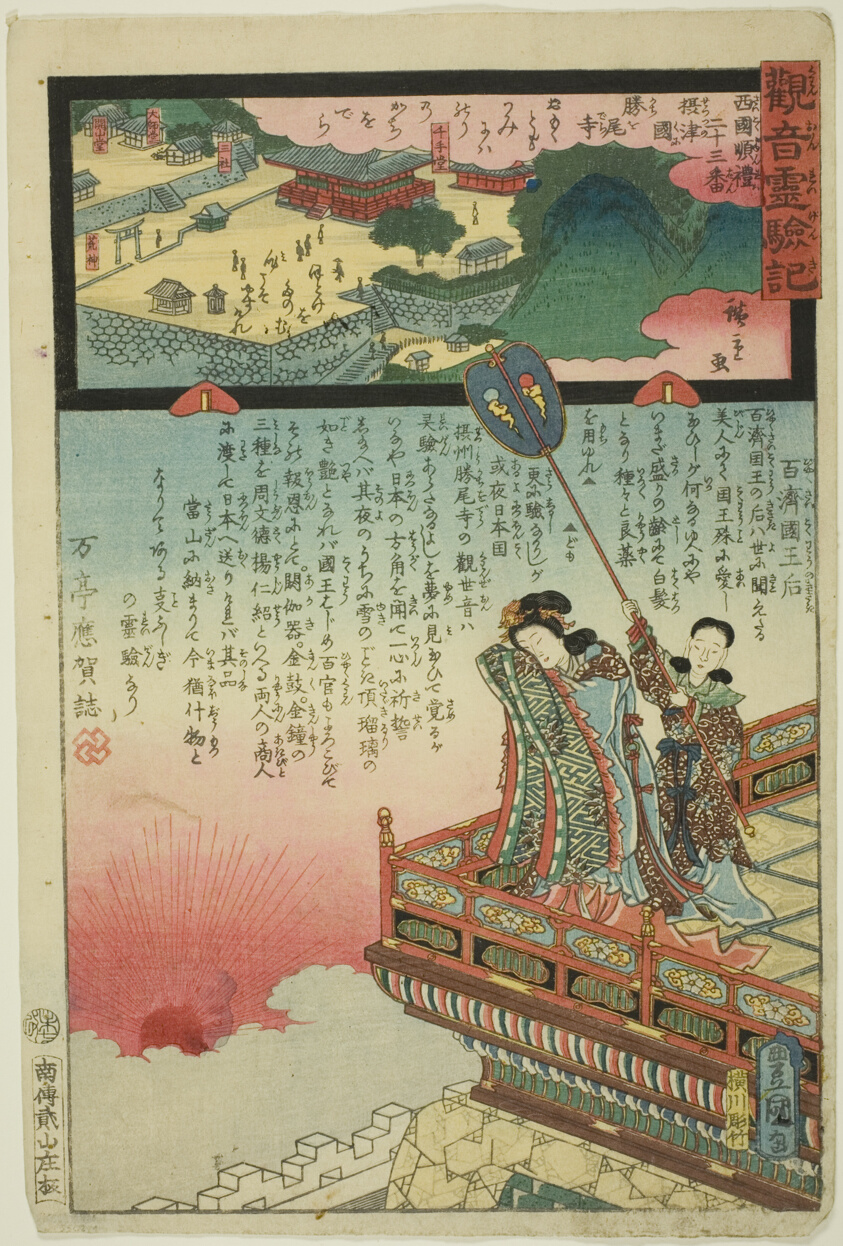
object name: Print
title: Kachio Temple in Settsu Province, No. 23 on the Saikoku Pilgrimage Route (Saikoku junrei nijusanban Settsu Kachiodera), from the series "The Miracles of Kannon (Kannon reigenki)"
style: Japanese (culture or style)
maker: Utagawa Kunisada I (Toyokuni III); Japanese, 1786-1864; Utagawa Hiroshige II (Shigenobu); Japanese, 1826–1869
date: 1859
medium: Color woodblock print; oban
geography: Japan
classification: woodblock print; print; asian art